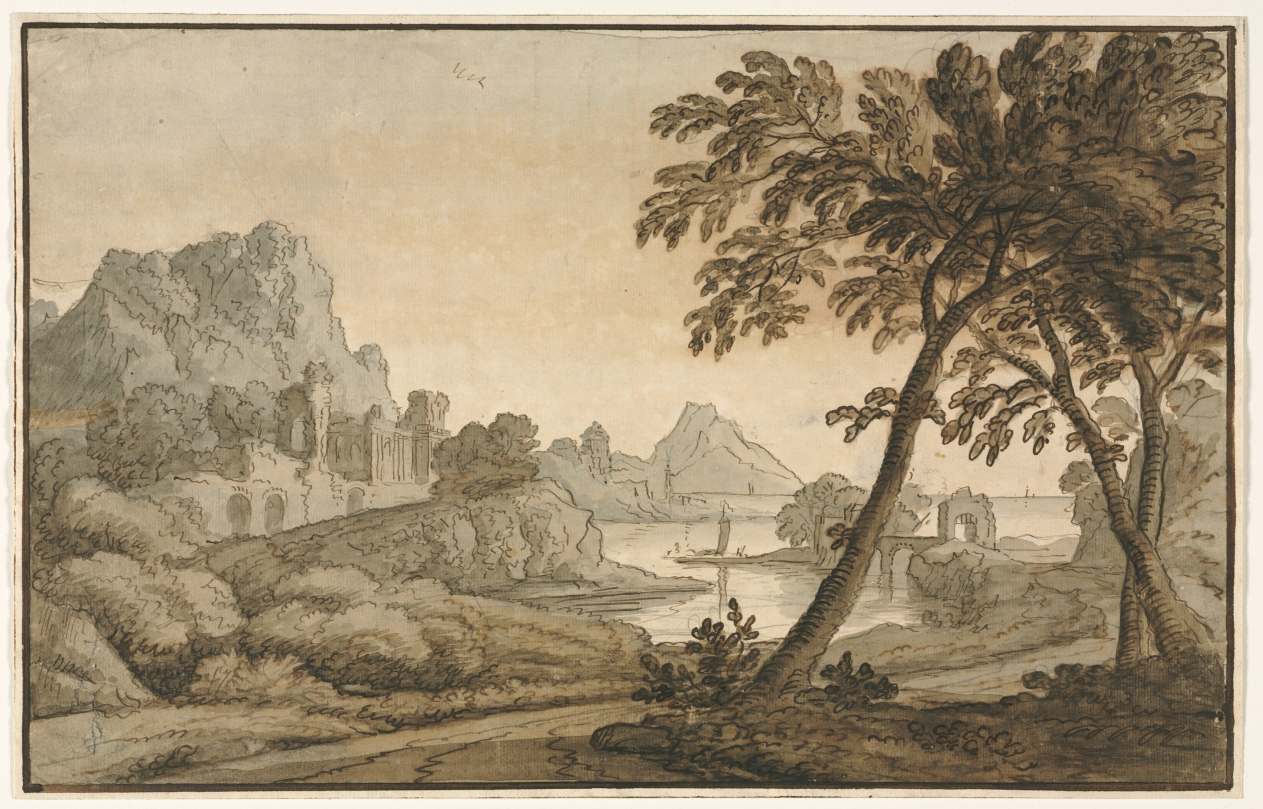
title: Italian Landscape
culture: England, 18th century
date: 1700s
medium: pen and brown ink, brown and gray wash, with graphite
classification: Drawing